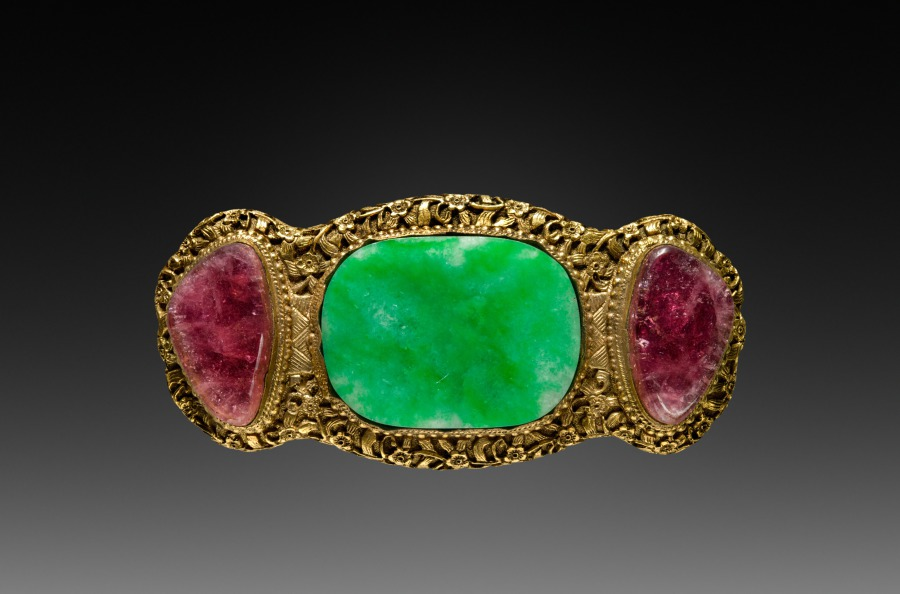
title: Buckle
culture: China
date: 1900s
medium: silver gilt, engraved and set with green jade and rose quartz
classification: Jewelry